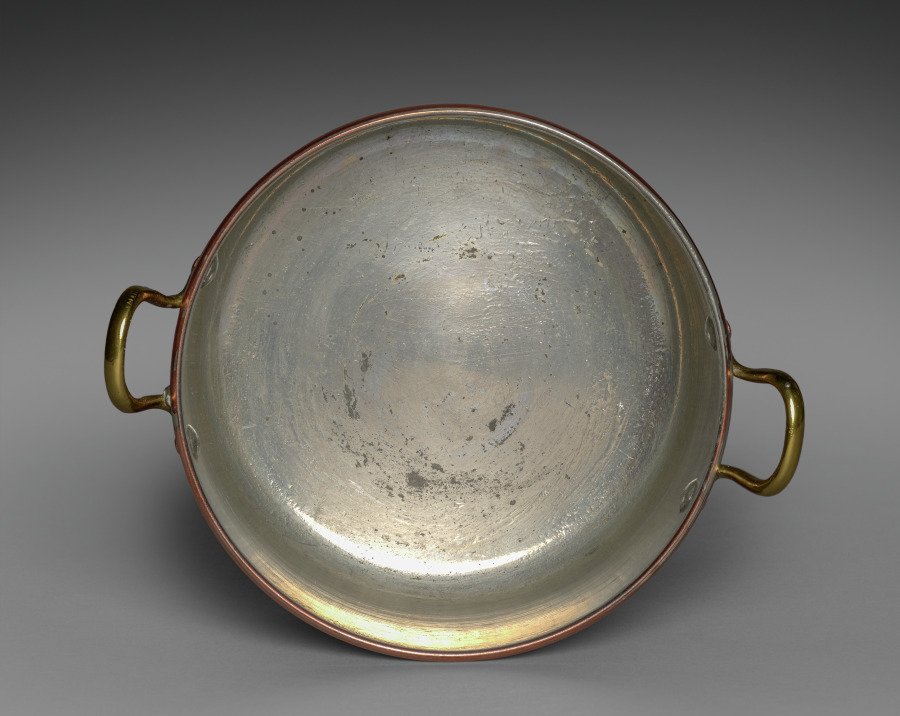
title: Pot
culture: Russia, St. Petersburg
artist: firm of Peter Carl Fabergé (Russian, 1846–1920)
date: 1914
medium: copper with brass handles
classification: Metalwork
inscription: inscribed: War (in Cyrillic), 1914r.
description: As Russia entered the First World War, austerity and economy settled into the fabric of life even among wealthy aristocrats and nobility. Not only were precious materials such as gold, silver, and gemstones hard to procure, but such luxury seemed out of place when so many men were dying at the front. Fabergé contributed to the war effort by making shells, casings, and other munitions out of brass and copper. He also made cookware, such as this small soup pot, to be sent to the front lines with provisions tucked inside. However, these simple forms only looked affordable. They were still a luxury only the wealthiest families could afford to send to their sons.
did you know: This copper soup pot was sent to the front lines filled with provisions during the First World War.